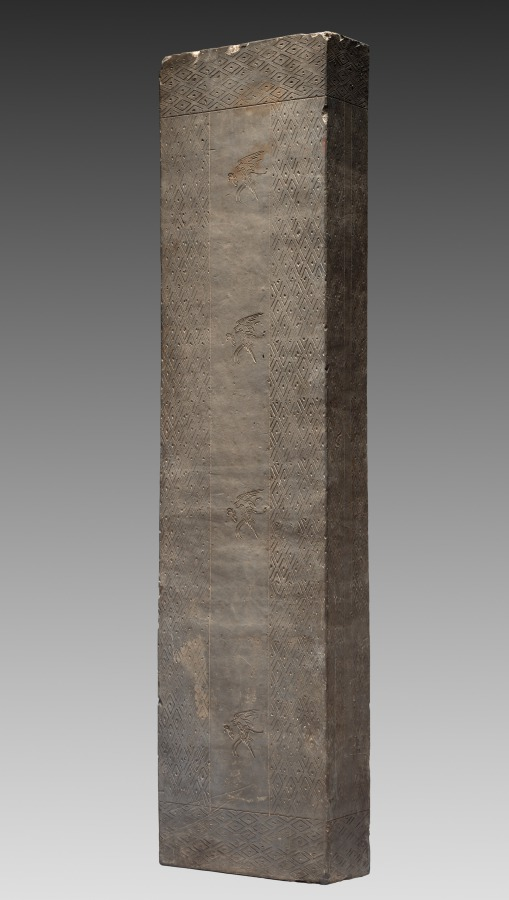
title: Tomb Tile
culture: China, Henan province, Jincun, Eastern Zhou dynasty (770–256 BCE)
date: 771–256 BCE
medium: earthenware with stamped decoration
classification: Ceramic